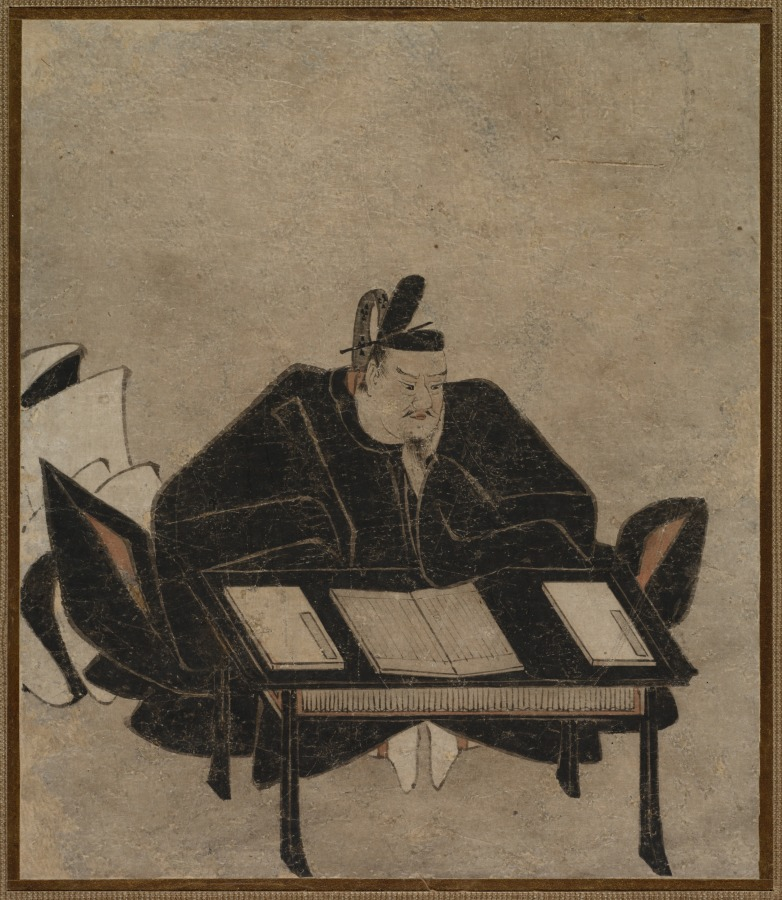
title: Seated Official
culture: Japan, Edo period (1615–1868)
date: 1700s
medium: album painting; ink and color on paper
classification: Painting